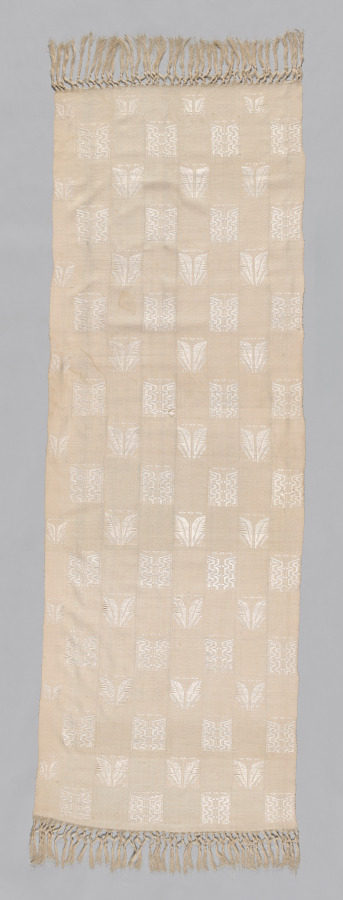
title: One of a pair of shawls (Lamba Landy Fotsy)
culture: Africa, East Africa, Madagascar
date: 1900s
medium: Silk (Bombyx mori and Borocera cajani)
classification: Textile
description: A lamba is an untailored textile worn by all ages, classes, and genders across much of Madagascar. This is an example of a woman’s garment made after Queen Ranavalona II made Christianity the state religion of the Merina Kingdom. Soon after, all-white lamba became popular for both Sunday church and daily wear. Fotsy is white in the Malagasy language. Indicating its owner’s worldliness, the white-on-white patterns alluded to fashionable imported textiles with damask patterns.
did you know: Invented in the mid-1800s, shawls like this were popular until about 2000.